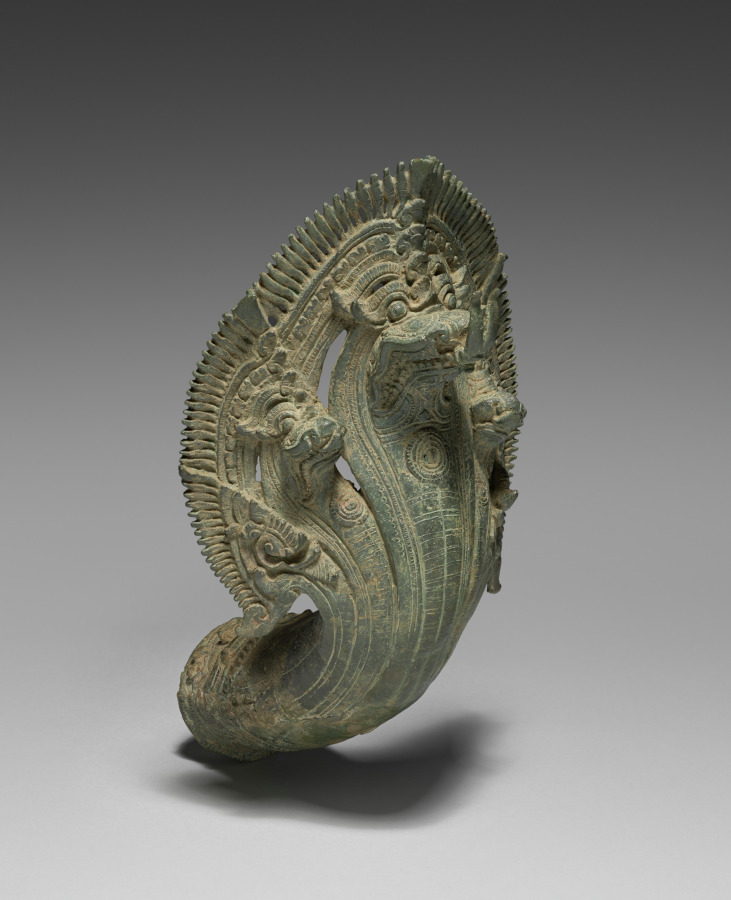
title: Naga Finial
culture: Cambodia, Angkor Wat Period, 12th century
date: 1100s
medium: bronze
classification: Metalwork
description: When members of the royal family or priesthood traveled in a public festival procession or to a temple to make offerings or participate in a ceremony, they would be carried in a palanquin, or a covered litter. Portable objects of veneration, such as bronze images or a sacred fire, were also carried on palanquins. The palanquins had wooden poles, hanging seats or raised platforms, and bronze fittings cast in intricate forms and gilt, lending the palanquins a sumptuous quality. The royal palanquins were typically fitted with multiheaded, serpent-shaped finials at the ends of the poles and corners of the elevated platforms. Naga means serpent in Sanskrit, a language from India selectively appropriated by the Khmer in Cambodia. In their own indigenous mythology, the Khmer people trace their descent from a naga princess and a prince from the island of Java who journeyed to Cambodia. The naga remains a potent emblem for the Khmer nation to this day; it is ubiquitous on Cambodian monuments.